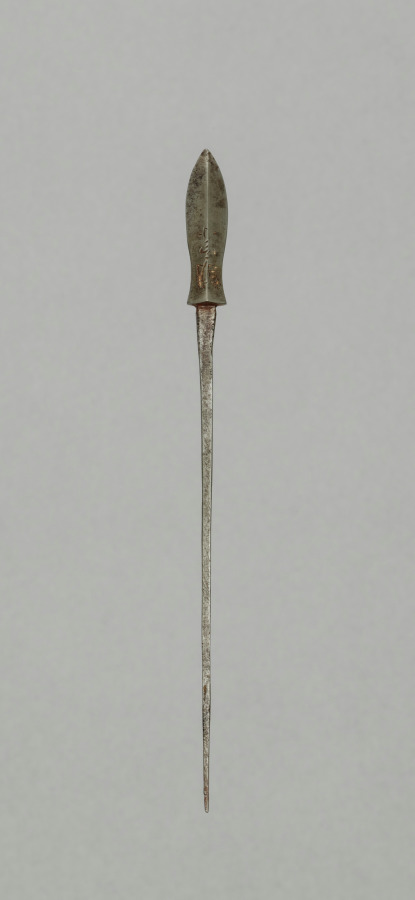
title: Arrow Point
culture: Japan, Edo period (1615–1868)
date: 1700s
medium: steel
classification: Arms and Armor